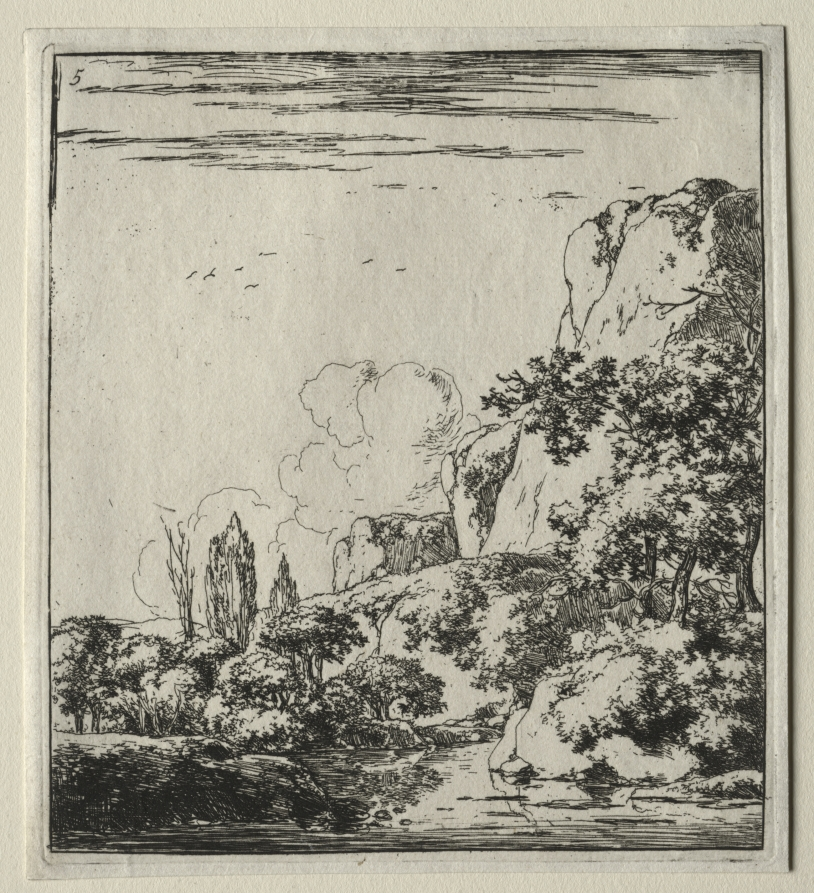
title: Le ruisseau au pied des rochere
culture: Flanders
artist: Herman Naiwincx (Flemish, c. 1624–after 1651)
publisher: Clement de Jonghe (Dutch, 1579–1679)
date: 1640–51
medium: engraving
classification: Print